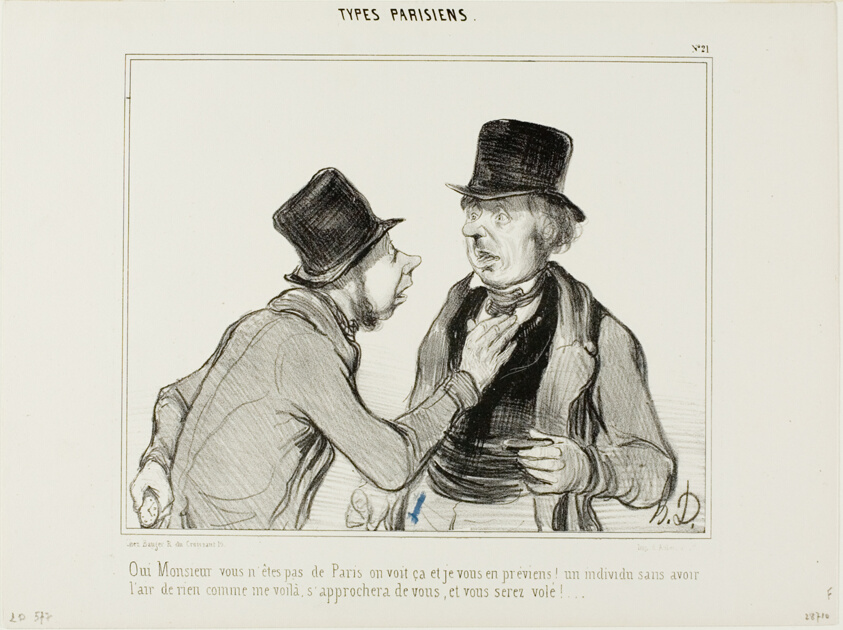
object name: Print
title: “I can see Monsieur that you are not from Paris. Let me warn you: there are people who look perfectly harmless just like me. They might approach you and rob you!,” plate 21 from Types Parisiens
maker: Honoré Victorin Daumier; French, 1808-1879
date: 1840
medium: Lithograph in black on white wove paper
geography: France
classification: lithograph; print; prints and drawing